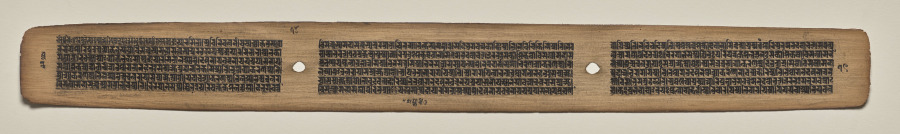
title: Text, Folio 74 (verso), from a Manuscript of the Perfection of Wisdom in Eight Thousand Lines (Ashtasahasrika Prajnaparamita-sutra)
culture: Eastern India, Bihar, Vikramashila Monastery. Painting: Nepal, Kathmandu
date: Sunday, September 14, 1119 (year 239 of the Newar Samvat in the month of Ashvina)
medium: gum tempera and ink on palm leaves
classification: Painting